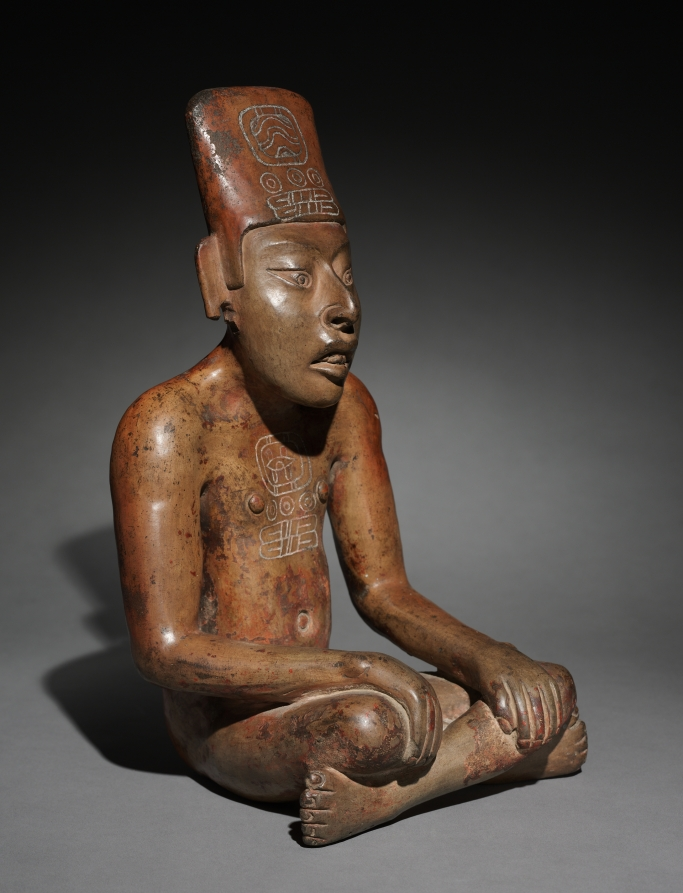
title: Seated Figure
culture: Mexico, Oaxaca, Zapotec style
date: 300 BCE–700 CE (thermoluminescence date, 285 BCE–515 CE)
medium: ceramic, slip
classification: Sculpture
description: The most famous Zapotec tomb ceramics are elaborate figural urns flanked by smaller, simpler companions similar to this one. Like other companions, this example probably belonged to a set of nearly identical figures; two others remain in Mexico. The identity of ceramic tomb figures-whether elite humans, royal ancestors, or deities-is still debated. The Zapotec developed one of Mesoamerica’s earliest writing systems, evidenced by the hieroglyphs on the headdress and chest. These are the names of calendar days, "13 Water" and "13 Flint Knife," respectively. Because people were named after the day on which they were born, one hieroglyph may identify the figure.